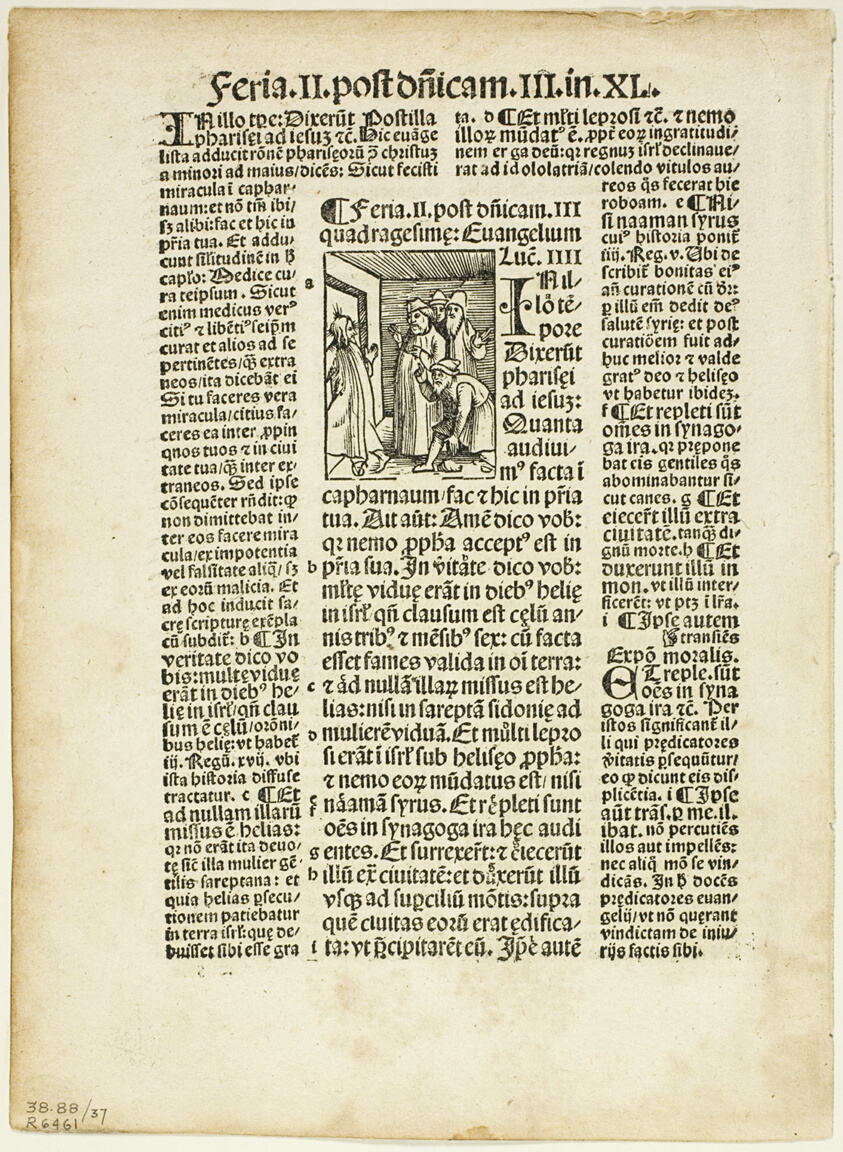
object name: Print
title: Illustration from Postilla by Parisienses Guillermus, plate 37 from Woodcuts from Books of the XVI Century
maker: Urs Graf (Swiss, 1485-1527/29); assembled by Max Geisberg (Swiss, 1875-1943)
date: 1514, assembled into portfolio 1937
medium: Woodcut on paper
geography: Switzerland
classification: woodcut; print; prints and drawing